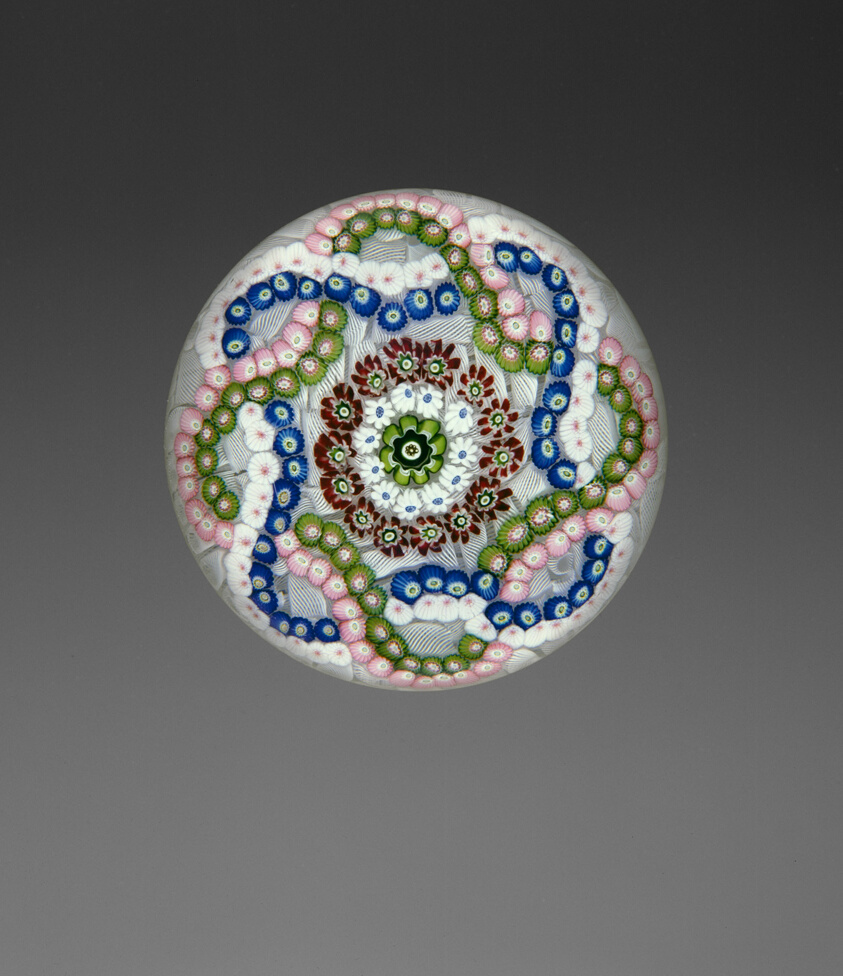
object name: Glass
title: Paperweight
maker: Clichy Glassworks (Cristalleries de Clichy); Clichy, France, 1837-1885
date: c. 1845/60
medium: Glass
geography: France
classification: paperweight; glass